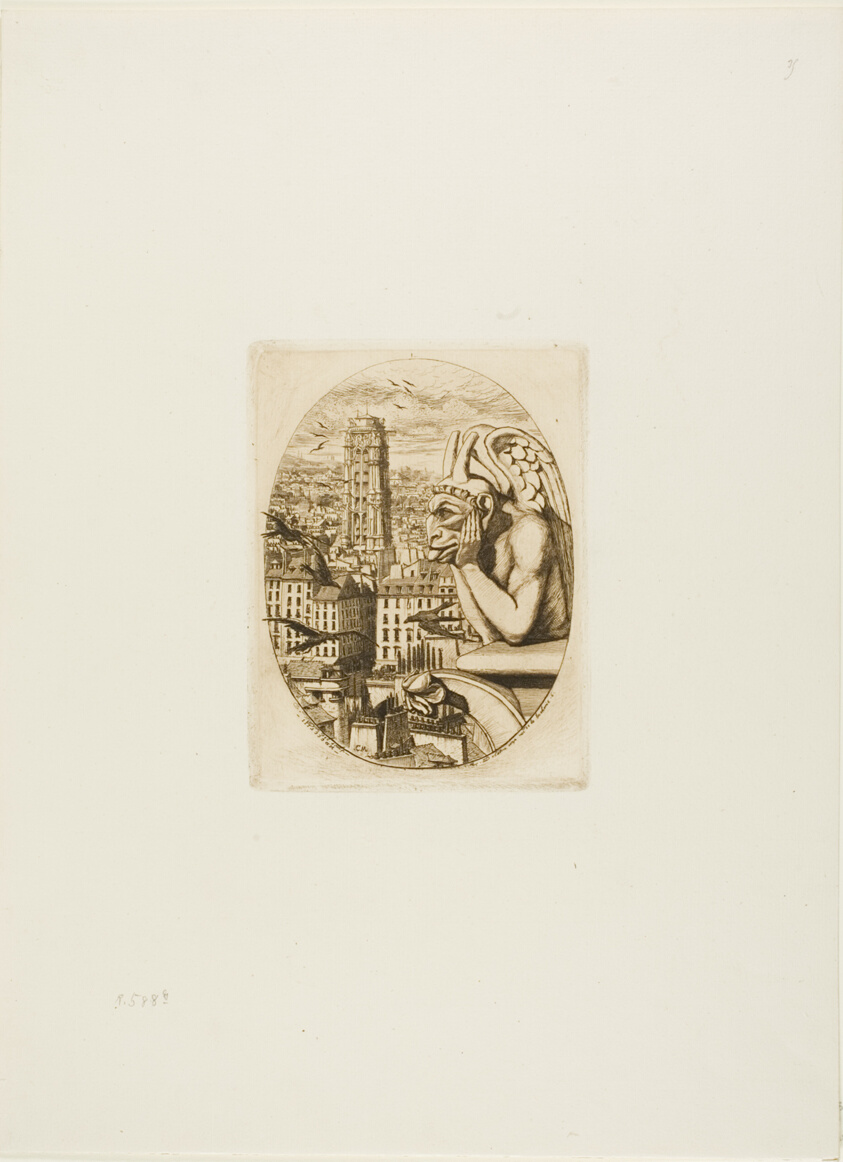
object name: Print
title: The Vampire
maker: Charles Meryon (French, 1821-1868); printed by Auguste Delâtre (French, 1822-1907)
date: 1853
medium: Etching and drypoint in dark brown on ivory laid paper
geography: France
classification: etching; print; prints and drawing